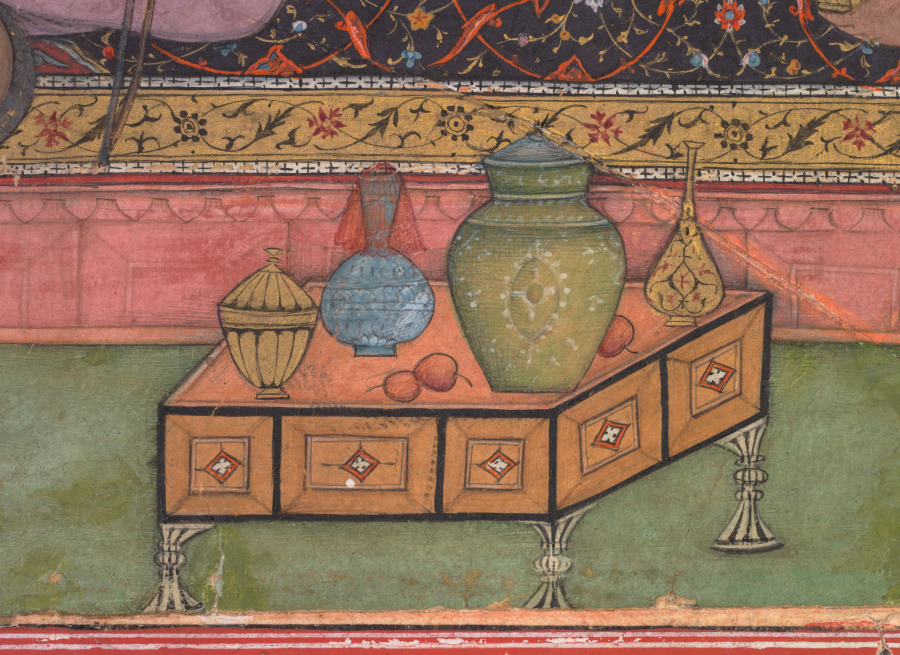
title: A Royal Picnic on a Terrace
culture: Mughal India, court of Akbar (reigned 1556–1605)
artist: attributed to Muhammad Ali (Persian, active 1590–1620)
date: c. 1620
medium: Gum tempera and gold on paper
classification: Painting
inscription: later Hindi inscription on reverse: Babur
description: A richly patterned carpet spans the width of the composition and forms the setting for a royal visit. The status of the highest-ranking person is indicated by the tan cloth placed over the carpet and the voluminous wine-colored cushion ornamented with stylized gold clouds. An attendant holding an emblem of Indian royalty, the fly whisk, stands to one side. At the far right of the carpet are two books, indicating that they are learned men. Like the carpet, the book covers have central medallions and borders, in line with the Persian aesthetic that the Mughals of India held in high regard.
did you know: A gentleman connoisseur has tucked a flowering sprig into his voluminous turban.